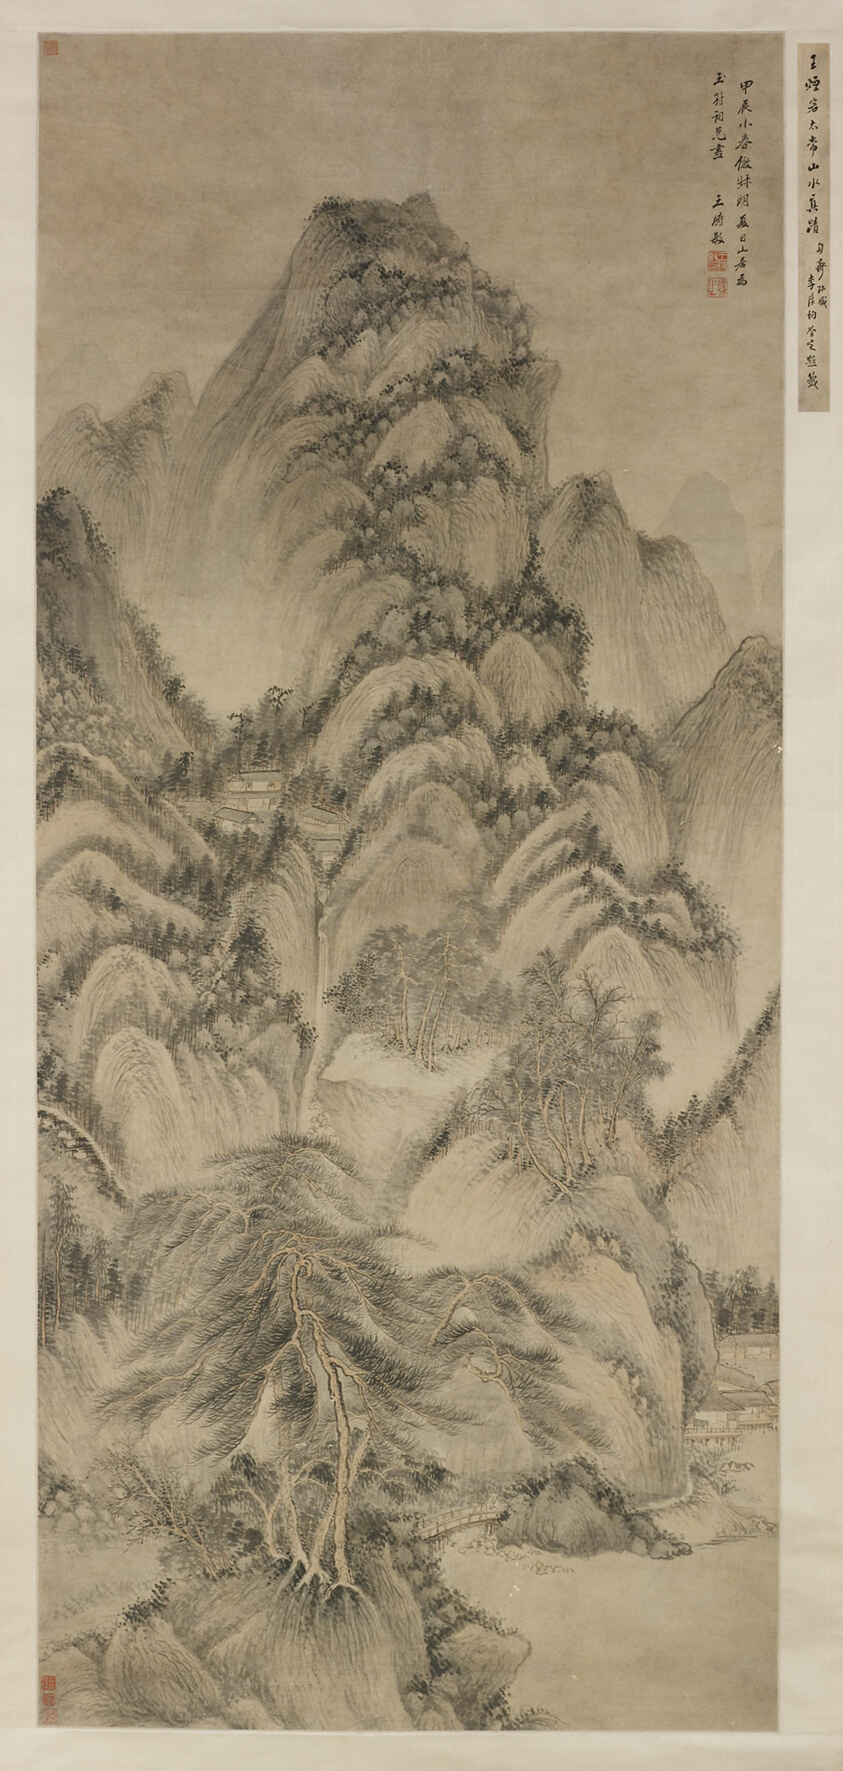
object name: Painting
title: Landscape after Wang Meng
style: Chinese (culture or style)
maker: Wang Shimin (Chinese, from Taicang, Jiangsu province, 1592-1680)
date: Qing dynasty (1644–1911), 1664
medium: Hanging scroll; ink and light color on paper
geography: China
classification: hanging scroll; painting; asian art